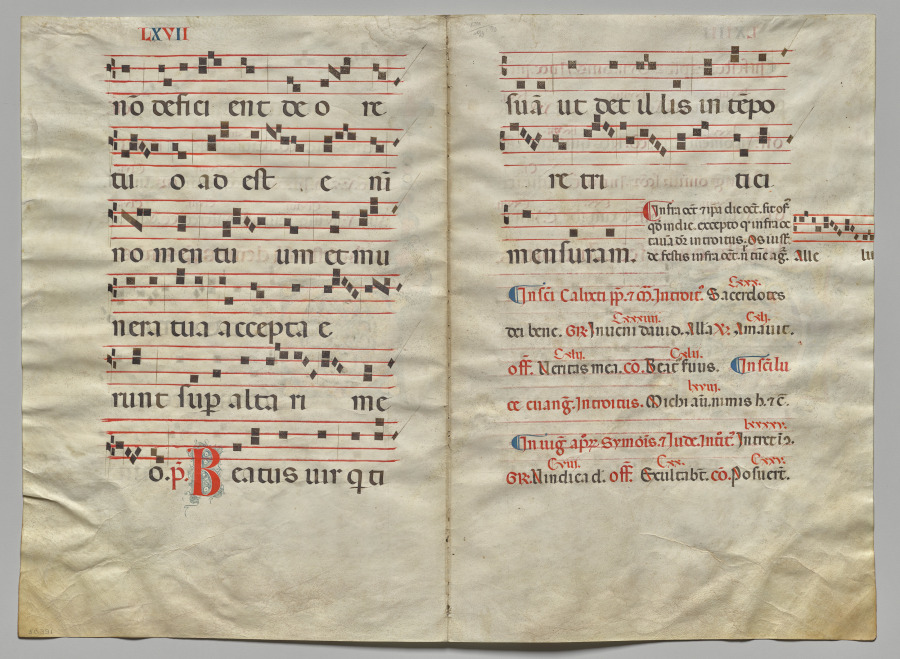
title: Bifolio from a Gradual: Music and Text (verso)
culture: Italy, Siena(?)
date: c. 1300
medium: Ink, tempera, and gold on vellum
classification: Manuscript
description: The large decorated initial G introduces the text, Gaudeamus omnes in Domino (Let us rejoice in the Lord). It is the beginning of the opening prayer, or introit, of the Mass for the Feast of All Saints (November 1). The figures within the initial include Christ, the Virgin Mary, and various saints.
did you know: Words written in red ink, called rubrics, indicate titles and chapter headings that are not part of a manuscript’s main text.